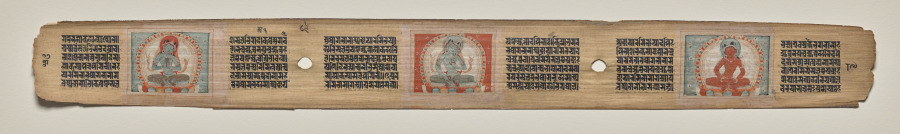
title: Three female figures, folio 89 (verso), from a Manuscript of the Perfection of Wisdom in Eight Thousand Lines (Ashtasahasrika Prajnaparamita-sutra)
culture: Eastern India, Bihar, Vikramashila Monastery. Painting: Nepal, Kathmandu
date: Sunday, September 14, 1119 (year 239 of the Newar Samvat in the month of Ashvina)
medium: gum tempera and ink on palm leaf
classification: Painting